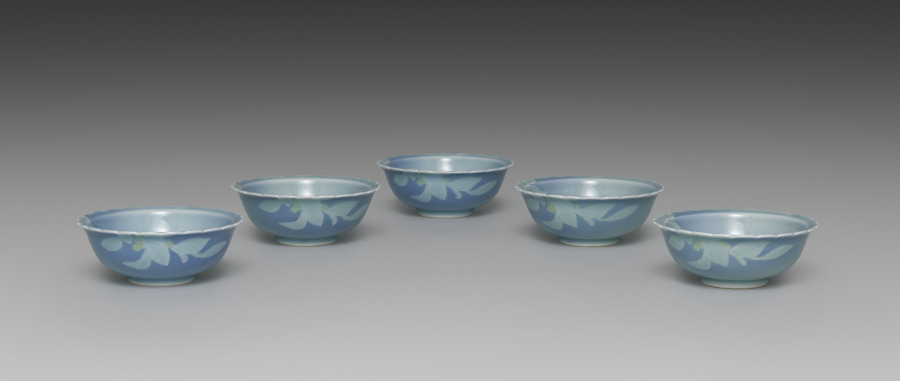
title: Dishes with Flowers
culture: Japan, Taishō period (1912–26) or Shōwa period (1926–89)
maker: Seifū Yohei IV (Japanese, 1872–1951)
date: 1914–46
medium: Set of five dishes; porcelain with underglaze yellow and blue glaze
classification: Ceramic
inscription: 清風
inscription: 清風造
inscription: 成山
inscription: 清風盧人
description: One can imagine a cool summer breeze when looking at this set of dishes, each shaped with a crenulated mouth and glazed with blue. Around the rim and into the basin, the bowls have low-relief designs of flowers with underglaze yellow petals; their leaves and stems show white through the glaze. On each dish, the design continues over the rim onto one side.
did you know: Seifū Yohei IV’s dishes with flowers feature underglaze yellow.